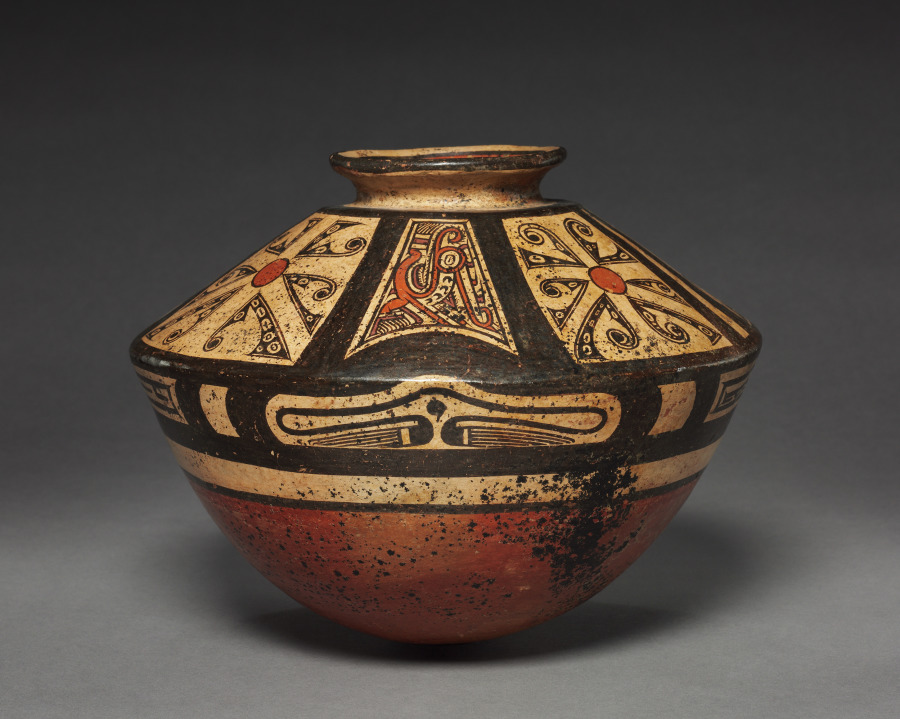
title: Vessel: Turtle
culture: Panama, Parita style, 11th-14th century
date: 1000–1300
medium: ceramic, slip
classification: Ceramic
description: Many Panamanian ceramics are among the most handsome and deftly designed in the Americas. Note how cleverly the artist used the vessel shape to imitate a turtle's carapace, its head peering out from its shell, its feet painted on the back (no. 10). And the stingray floats atop its pedestal, as though gliding through water (no. 9). Lamentably, little is known about the meaning of these witty ceramics.